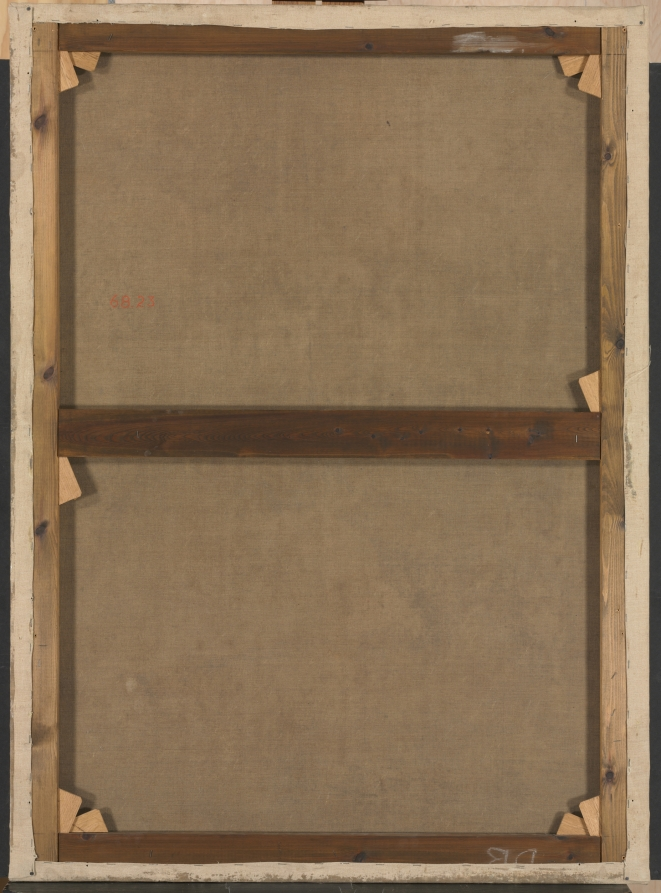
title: Samson and Delilah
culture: Netherlands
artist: Gerrit van Honthorst (Dutch, 1590–1656)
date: c. 1616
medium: oil on canvas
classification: Painting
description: In retaliation for Samson’s single-handed decimation of their army, the Philistines bribed his lover Delilah to discover the source of his strength: his hair, uncut since birth. Samson’s hair was shorn as he lay sleeping in Delilah’s lap, draining his strength and allowing the Philistines to capture him. Honthorst intensified the inherent drama of the scene by limiting his depiction to just three closely packed figures, starkly illuminated by a single candle. The old woman’s silencing gesture involves the viewer in the action, making us complicit in Delilah’s deceit.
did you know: Flickering candlelight and a nocturnal setting enhance the furtive nature of Delilah's actions.